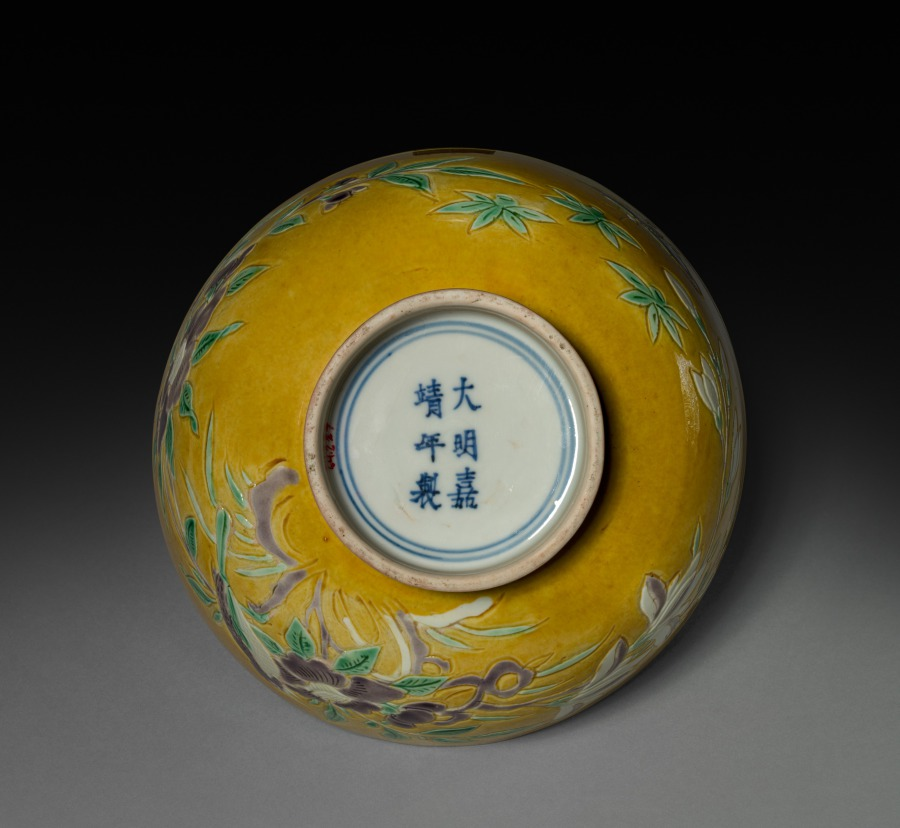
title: Bowl with Birds and Flowers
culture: China, Jiangxi province, Jingdezhen kilns, Qing dynasty (1644-1911), "Transitional Period," Shunzi period (1644-61)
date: 1644–61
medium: porcelain with incised and sancai (3-color) enamel decoration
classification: Ceramic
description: This porcelain bowl is considered to have been made in the "Transitional period," a term used to define the period between about 1620 and 1683 when official kilns in Jingdezhen were no longer under imperial supervision due to the transition from the Ming to the Qing dynasties.